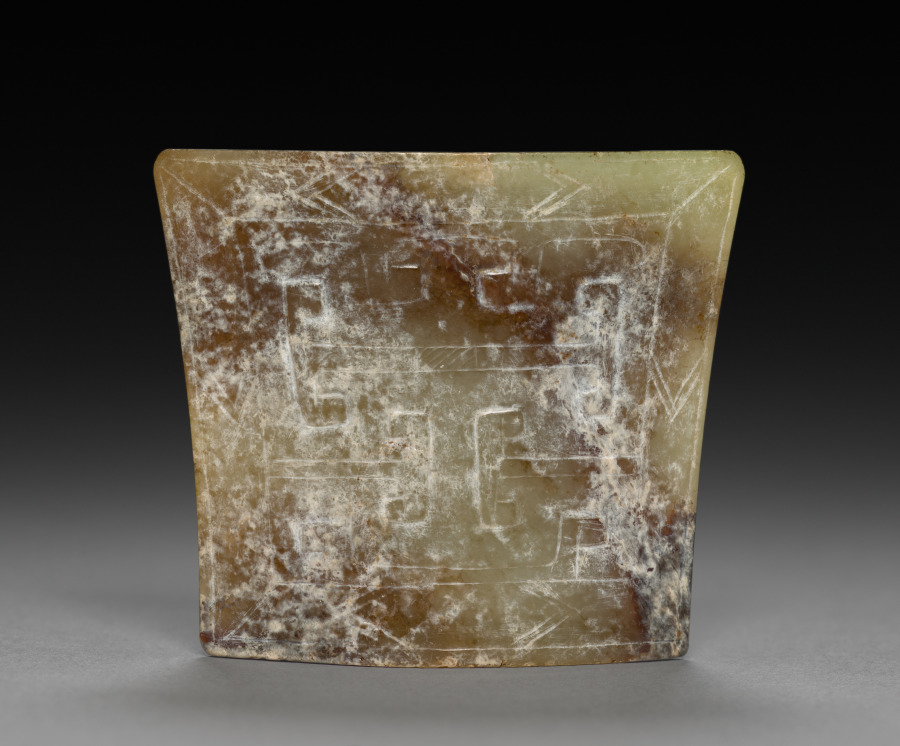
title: Scabbard Chape (Bi)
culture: China, Han dynasty (202 BCE–220 CE)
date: 206 BCE–220 CE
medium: jade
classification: Jade